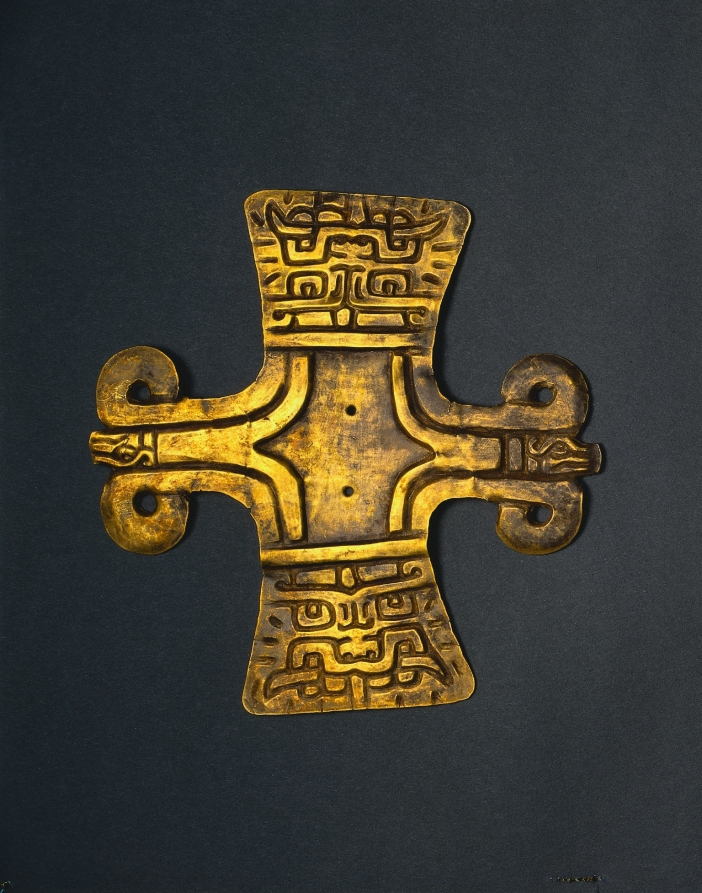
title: Cross-Shaped Ornament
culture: Peru, North Highlands, Chavín de Huantar(?), Chavín style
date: c. 500–200 BCE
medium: hammered and cut gold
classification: Metalwork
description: There seems to be a link between Chavín religion and appearance of the Andes’ first large precious-metal objects, made using revolutionary new metallurgical processes. Chavín may have developed these technical innovations to express the inexpressible, the "wholly other" nature of its religion. In many areas, elite men and women wore the ornaments as emblems of their ties to this religion, and eventually were buried with them. These 16 objects, along with three others not in the museum’s collection, are said to have come as a group from Chavín itself.